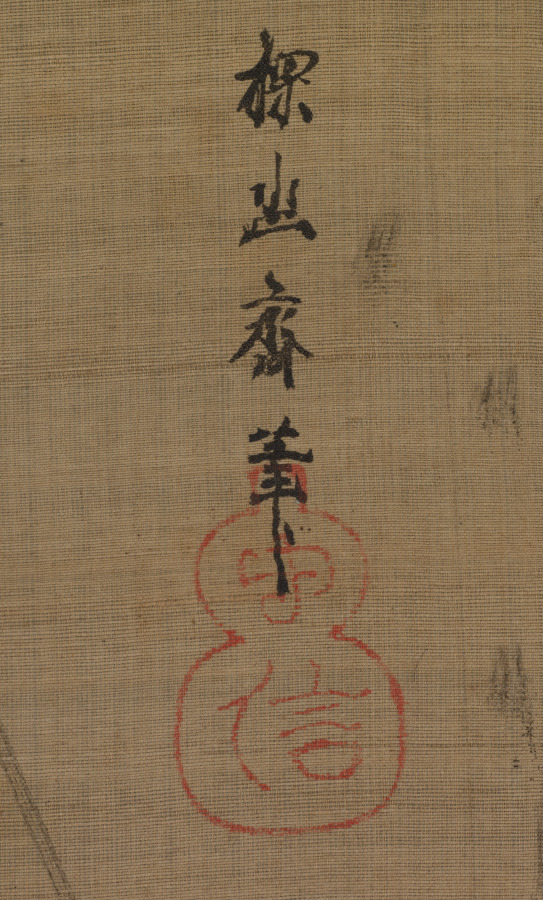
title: Gibbons Reaching for the Moon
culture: Japan, Edo period (1615–1868)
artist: Kano Tan’yū (Japanese, 1602–1674)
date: 1600s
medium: Hanging scroll; ink and light color on silk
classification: Painting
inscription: signed: "Tan'yūsai hitsu"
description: Long-armed gibbons form a chain to reach down from a tree, hoping to touch what they believe is the moon. In fact, the orb remaining beyond their grasp is the full moon’s reflection in the still surface of a pond or lake. The image is a common metaphor for the deluded mind in Buddhist thought. Gibbons do not live in Japan but were known to Japanese painters of the premodern era through paintings brought from China.